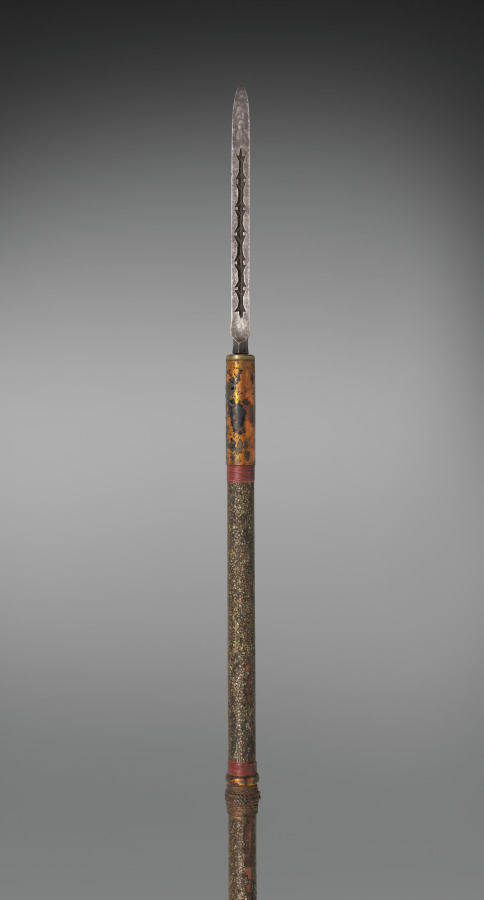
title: Spear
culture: Japan, Edo period (1615–1868)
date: 1700s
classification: Arms and Armor